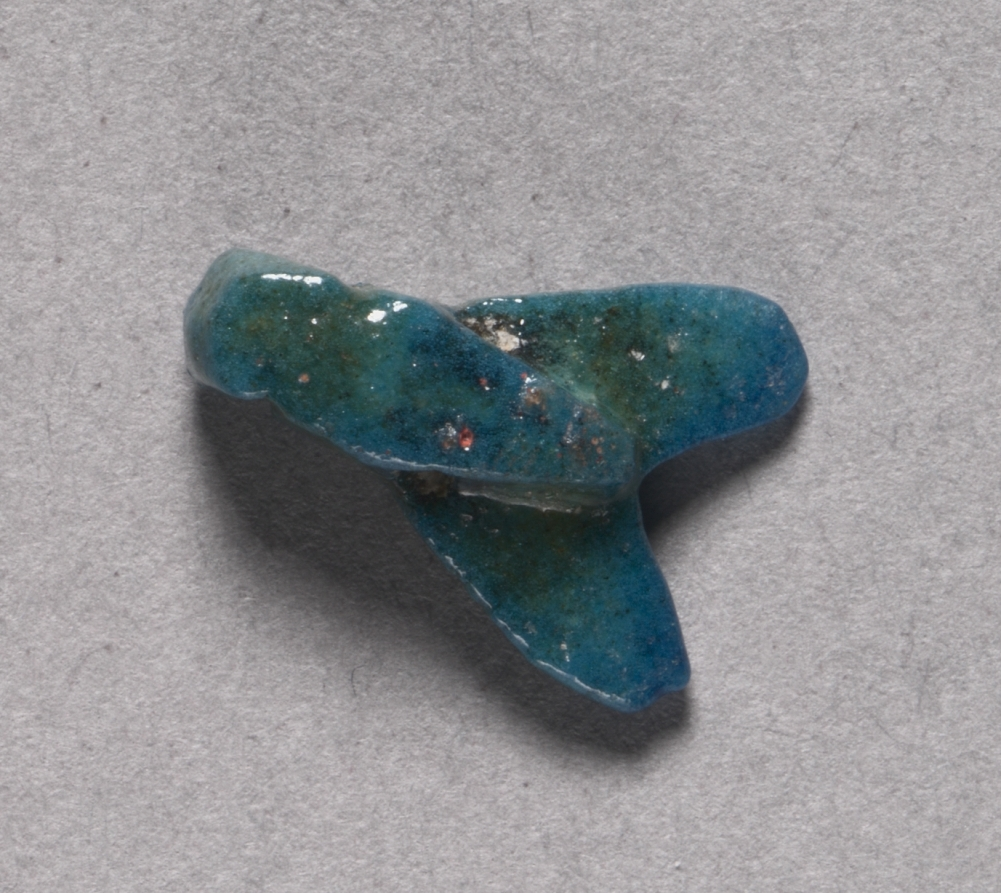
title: Fly Amulet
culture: Egypt, Middle Kingdom (2040–1648 BCE)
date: 2040–1648 BCE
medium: deep turquoise green faience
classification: Amulets